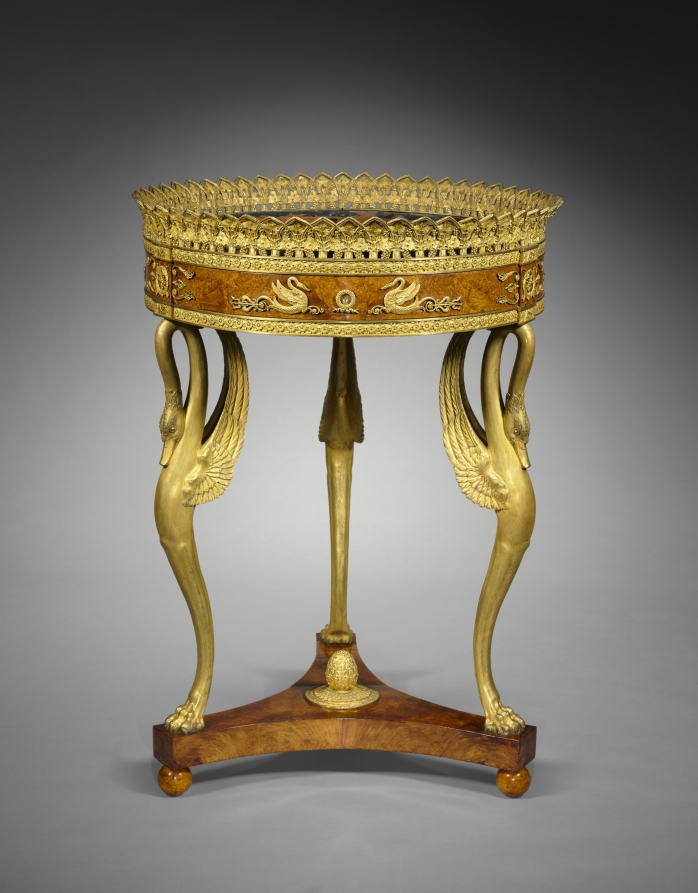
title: Flower Stand (Jardinière)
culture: France, early 19th Century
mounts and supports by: Pierre Philippe Thomire (French, 1751–1843)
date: c. 1800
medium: wood with gilt bronze mounts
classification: Furniture and woodwork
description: Thomire was the most productive and famous bronze caster in Paris around 1800. The border of this flower stand was cast from the same molds used for a centerpiece signed by Thomire; therefore, the stand can safely be presumed to have been produced by Thomire as well.